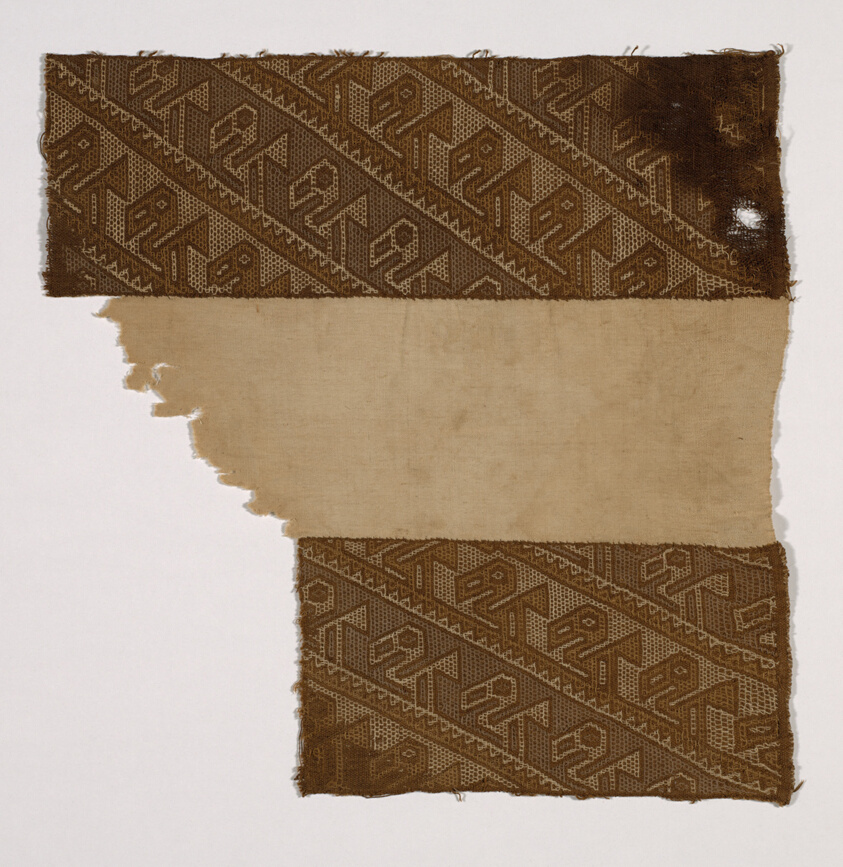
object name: Textile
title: Fragment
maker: Probably central coast, Peru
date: A.D. 1000/1476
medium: Cotton and wool; tabby and compound weave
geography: Peru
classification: textile; weaving